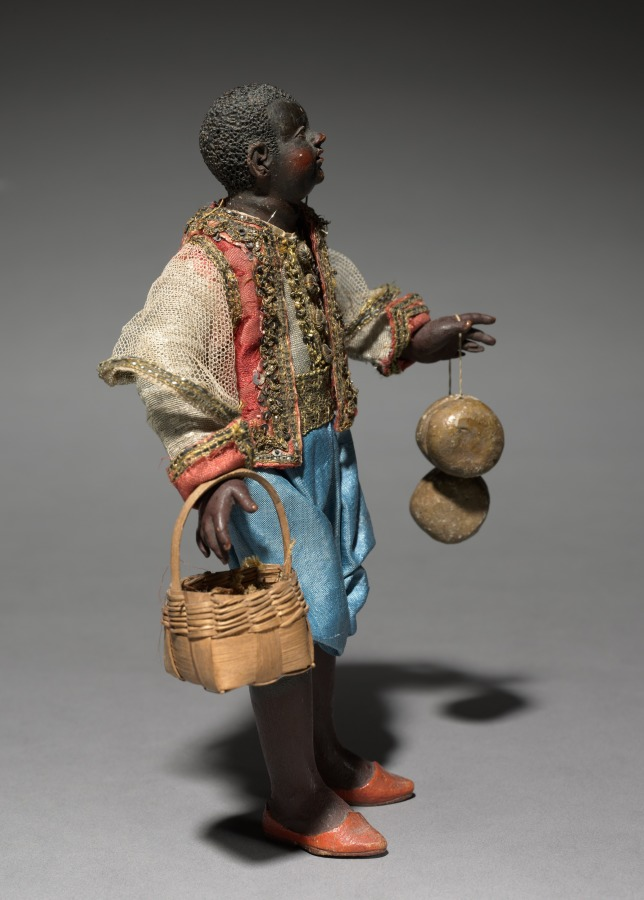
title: Figure from a Crèche: Attendant of the Magi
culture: Italy, Naples, late 18th-early 19th century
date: 1780–1830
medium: painted wood and terracotta with various textiles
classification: Sculpture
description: The practice of creating scenes of the Nativity for the home dates from the early 1700s in Italy, where people began to set up doll-like figures of about a foot or less in height. The custom was particularly popular in Naples around 1800, where crèche scenes (crèche means cradle, or crib) included many figures, whose heads and hands of painted terracotta, stuffed cloth bodies, and clothing adapted from contemporary local costumes gave them an amazingly realistic character. Representations of the birth of Jesus can be traced to the first few centuries of Christianity. Both living creatures and sculptural depictions of them were used from early times. By the late middle ages it was customary to create life-size figures of wood or stone, naturalistically painted, to represent the characters who participated in the events of Jesus's early life. These sculptures were then arranged in scenes illustrating one or both of the most important of these events, the Adoration of the Shepherds and the Adoration of the Magi-the three kings from the East who came to pay homage to the Christ child. Used in churches, these large figures were especially popular in Italy, Central Europe, Spain, and Portugal. This Object in Focus presentation was organized by Henry Hawley, Curator of Renaissance and Later Decorative Arts and Sculpture.